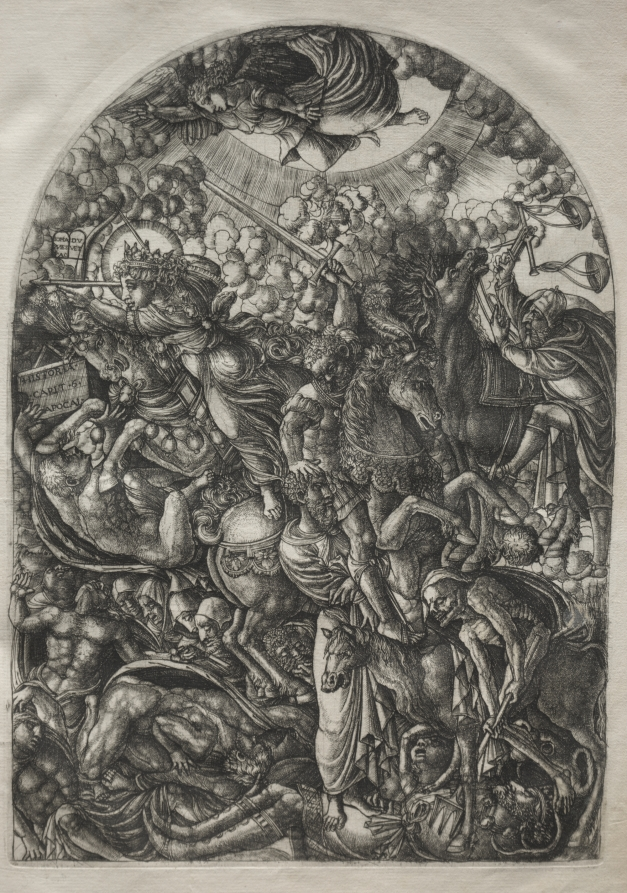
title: The Apocalypse: St. John Sees the Four Riders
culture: France, 16th century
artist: Jean Duvet (French, 1485–1561)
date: 1546–1556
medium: engraving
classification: Print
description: This print is part of a bound volume of works illustrating the a narrative of the Apocalypse, taken from the Revelation of Saint John in the Bible. The 23 engravings in the series occupied the artist for a number of years and represent his greatest artistic achievement. The museum's volume is one of only seven known complete sets. Jean Duvet was one of the first major printmakers in France and one of the most original artists of the 1500s. Although he worked mostly in the provincial city of Langres, he became aware of Italian art through the circulation of prints—notably those of Marcantonio Raimondi. His solidly modeled human figures reflect the influence of the Italian High Renaissance. Duvet, however, developed an idiosyncratic, highly artificial style with crowded compositions that ignore rational space in favor of ornamental surface patterns.